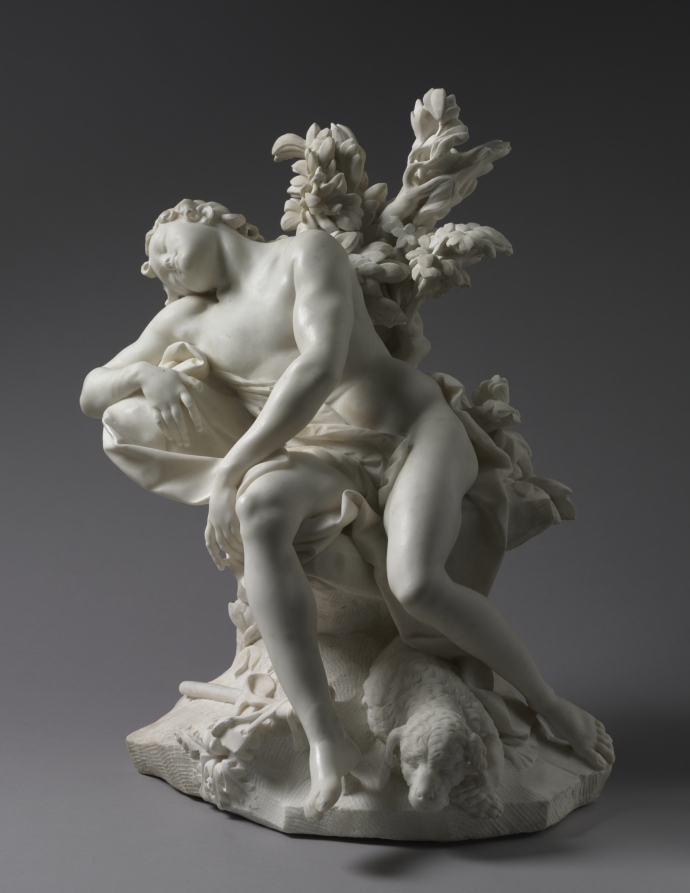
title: Sleeping Endymion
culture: Italy, 18th century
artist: Agostino Cornacchini (Italian, 1686–1754)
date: 1716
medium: marble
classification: Sculpture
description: Cornacchini moved away from the dramatic movement and light effects characteristic of baroque sculpture toward a calmer, gentler, more graceful style favored by 18th-century taste. This sculpture depicts Endymion, a beautiful young shepherd from Greek mythology. His beauty so entranced Selene, the personification of the moon, that she asked Zeus to grant Endymion immortality. Zeus did so, but only after placing Endymion in an eternal sleep.